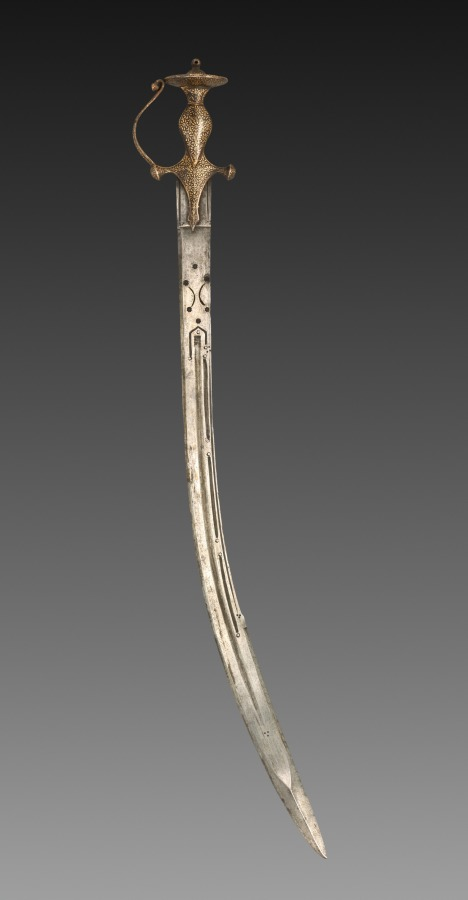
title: Tulwar sword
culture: India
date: before 1919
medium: iron with gold inlay; steel blade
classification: Arms and Armor